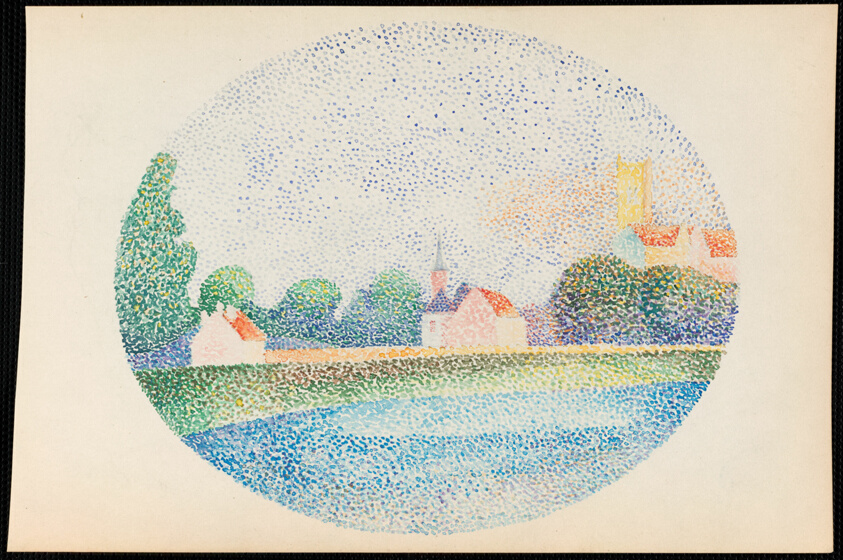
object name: Drawing and Watercolor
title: Morning on the Marne at Meaux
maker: Albert Dubois-Pillet (French, 1846-1890)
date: 1885/86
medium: Watercolor, over traces of graphite, on cream wove paper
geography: France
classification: prints and drawing; watercolor; drawings (visual works)